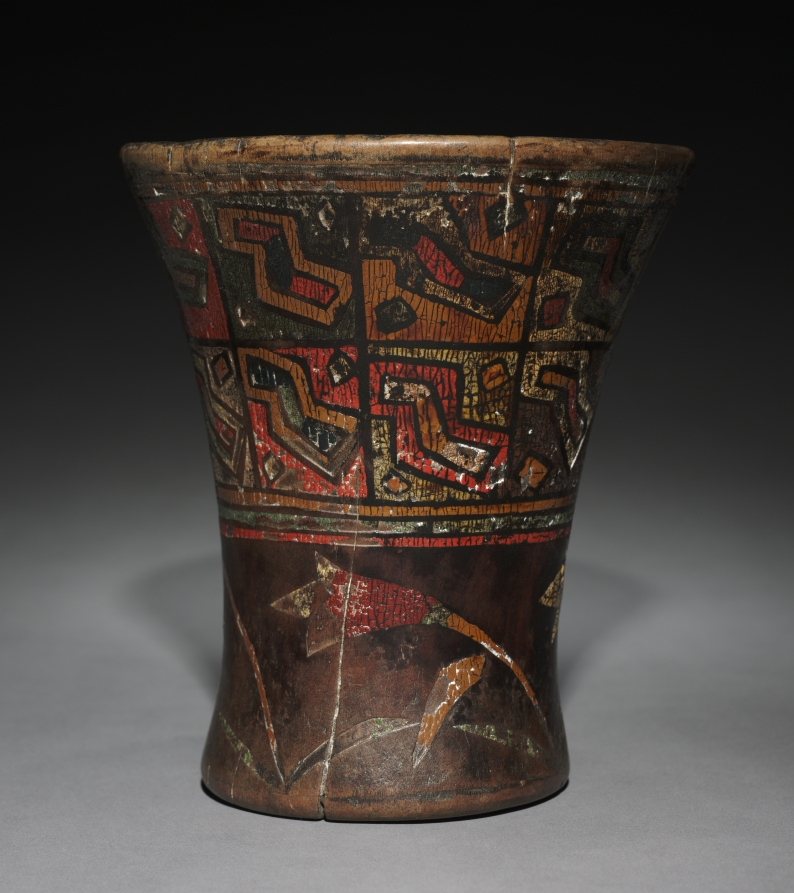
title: Kero (Waisted Cup)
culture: Peru, Colonial Inka style, 16th century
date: after 1550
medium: wood, inlaid pigments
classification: Wood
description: Keros, used to drink the maize beer chicha, were essential items of Inka statecraft. Made and used in pairs, they reflect the important Andean concept of reciprocity. Native use of keros continued in the colonial period, the date of these two examples, which come from separate pairs. The example with geometric motifs is closest to pre-conquest models. On the second, two armies converge: the Inka, dressed in tunics with waistbands, and their opponents, perhaps jungle people whose body parts are heaped in a centerpiece.